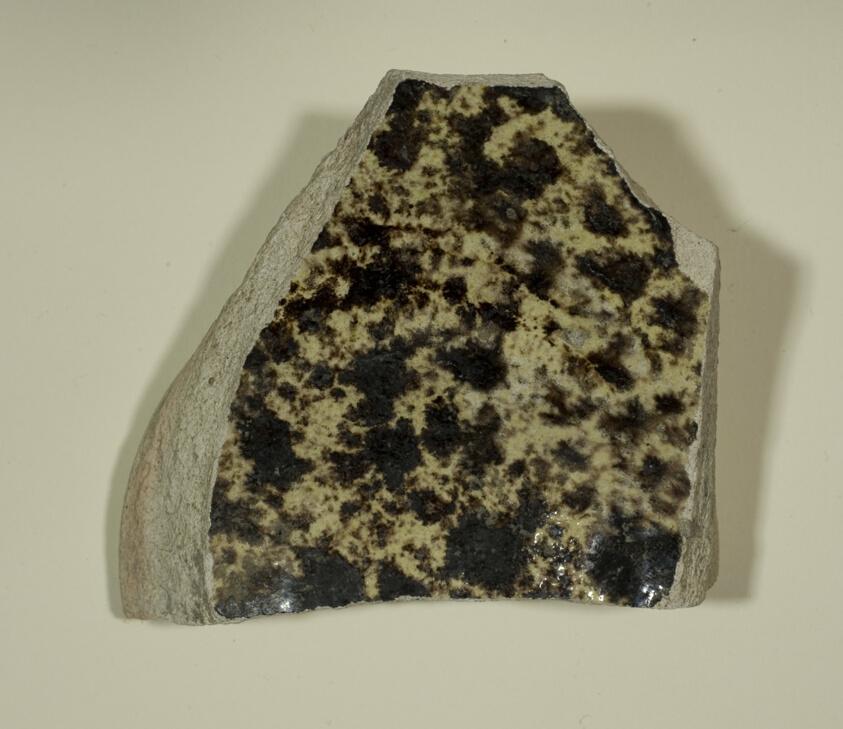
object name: Decorative Arts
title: Fragment of a Bowl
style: byzantine, european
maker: Byzantine (Asia Minor, Constantinople)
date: 14th century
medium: Ceramic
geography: Istanbul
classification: fragment; ceramics; vessel; bowl; asian art; decorative arts